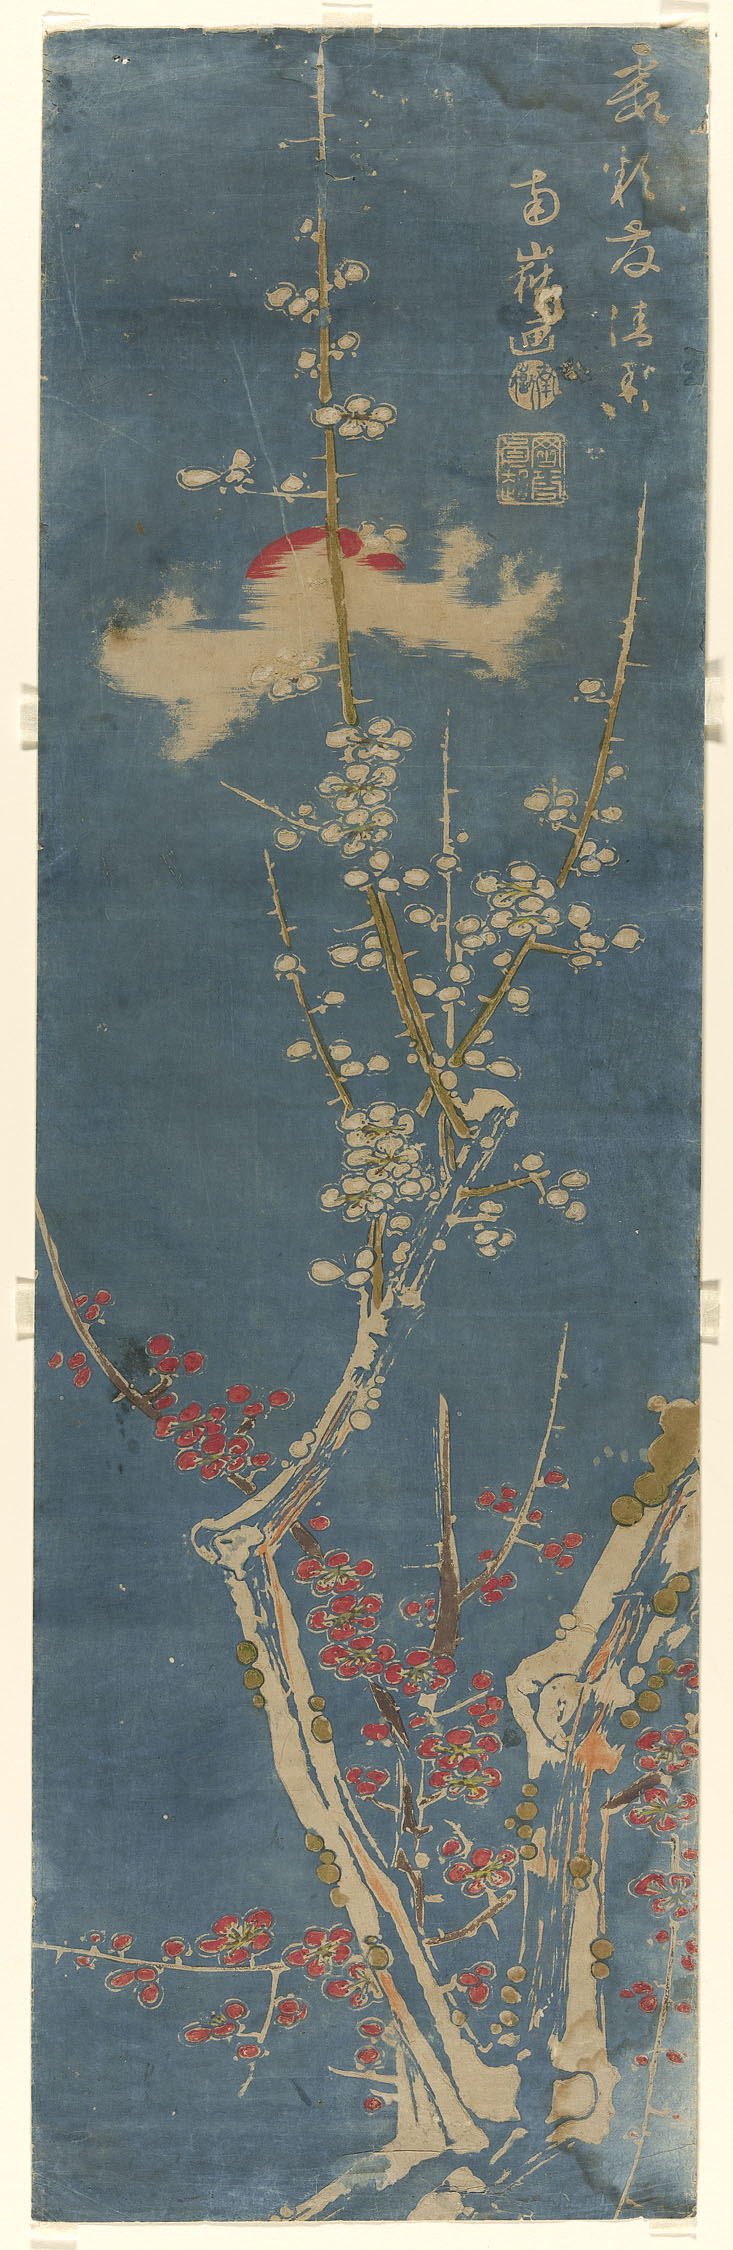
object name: Print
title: Plum Branch and Rising Sun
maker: Watanabe Nangaku (Japanese, 1767-1813)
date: early 19th century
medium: Color woodblock print; kakemono-e, shomen-ban; ishizuri-e (stone print)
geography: Japan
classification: woodblock print; print; asian art